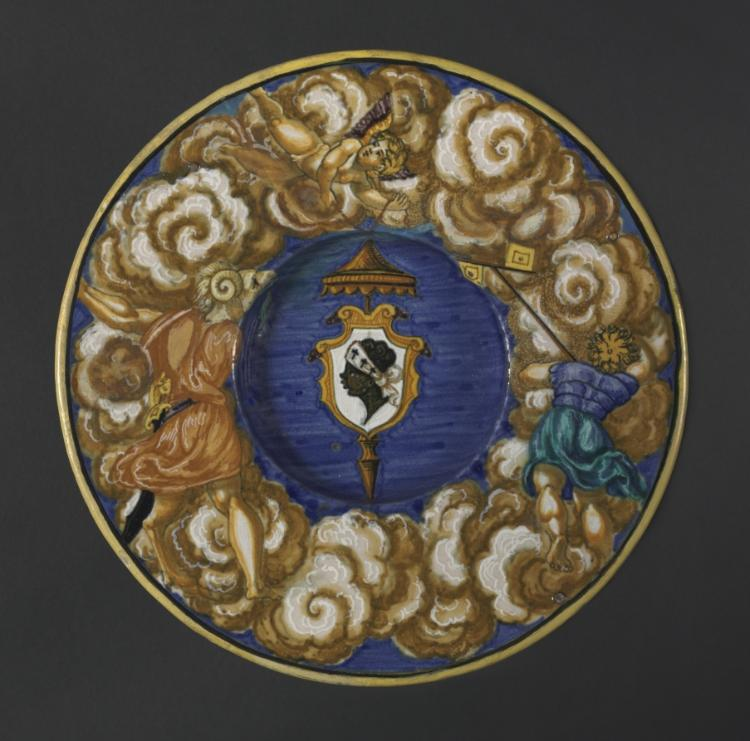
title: Plate with the Arms of the Pucci Family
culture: Italy, Urbino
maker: Francesco Xanto Avelli (Italian, 1487?–1544?)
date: 1532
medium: tin-glazed earthenware (maiolica)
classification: Ceramic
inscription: inscription: F(rancesco) X(anto) A(velli) (da) R(ovigo)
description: Italian nobles of the 1500s often expressed their wealth, social status, and sophistication by ordering large sets of maiolica that sometimes carried their coats of arms or even likenesses, usually in profile as in portraits of the period. The Pucci family was a powerful noble household in Renaissance Florence who were at times quite close allies of the Medici, a prominent banking family.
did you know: A more contemporary head of the family, Emilio Pucci, became famous as a fashion designer in the 1960s and 1970s.